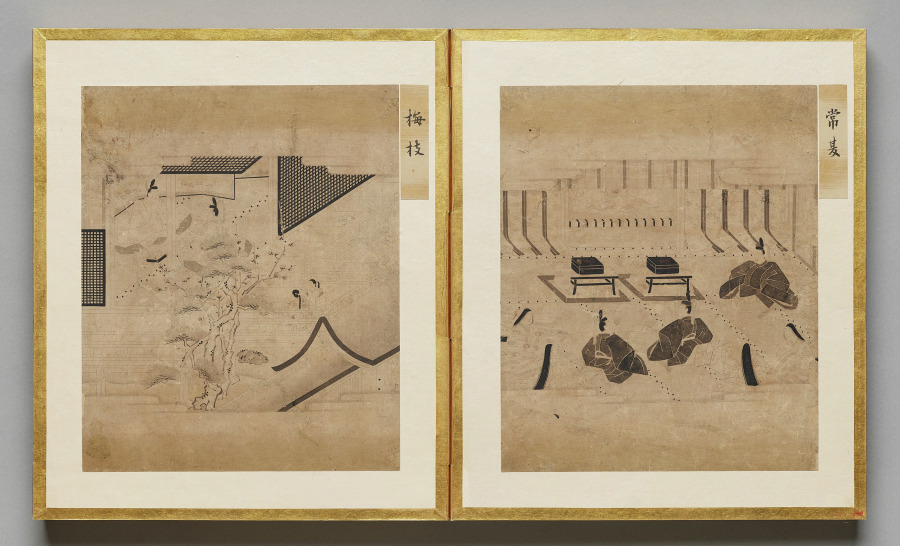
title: Wild Carnation from Album of Illustrations for the Tale of Genji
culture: Japan, Edo period (1615–1868)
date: 1600s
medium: painting in an accordion-style album; ink, light color, and gold on paper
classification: Bound Volume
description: This album contains illustrations for the classic literary work the Tale of Genji, authored in the 1000s by Murasaki Shikibu, an aristocrat of the Heian period (794–1185) court. The scenes are painted in the “white drawing” (hakubyō) mode, in which a fine ink line is used to depict figures and spaces with great subtlety, punctuated only occasionally by traces of red pigment for a character’s lips, a detail of a garment, or a decorative element. These two scenes illustrate episodes from the chapters “Thin Veil of Cloud” (Usugumo) and “Barrier Gate” (Sekiya).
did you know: The illustrations are identified by chapter title in cartouches to the upper right of the paintings.